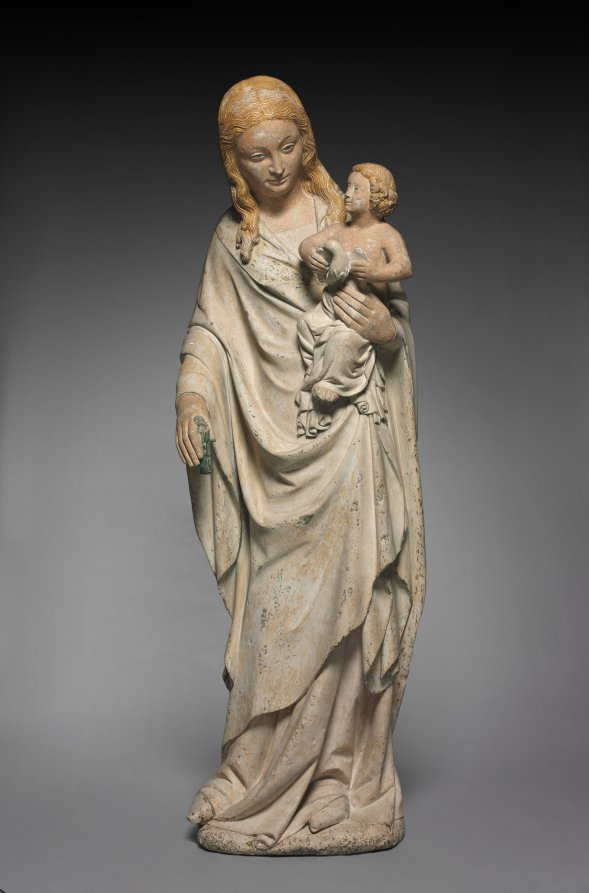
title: Virgin and Child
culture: France, Loire Valley, 14th century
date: c. 1385–90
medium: limestone with traces of polychromy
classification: Sculpture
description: The vibrant naturalism of the Virgin’s face and long flowing hair, as well as the deep, rich folds of drapery are characteristic of the work of itinerant artists from the Netherlands who found employment at the Valois courts of France at Paris, Berry, and Burgundy. Their native styles and attention to realistic detail fused with native French artistic traditions toward the end of the 14th century and took root. The original source of this Virgin and Child is unknown, but its style suggests a relationship with similar sculptures made for churches and abbeys of the Central Loire Valley. The additional influence of the style of the sculptor André Beauneveu has also been noted for this sculpture. His commissions were abundant and his influence widespread. The sculptor of this work appears to have had some knowledge of Beauneveu’s work in the Loire region.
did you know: This sculpture was painted over many times over its history, common for medieval sculpture.